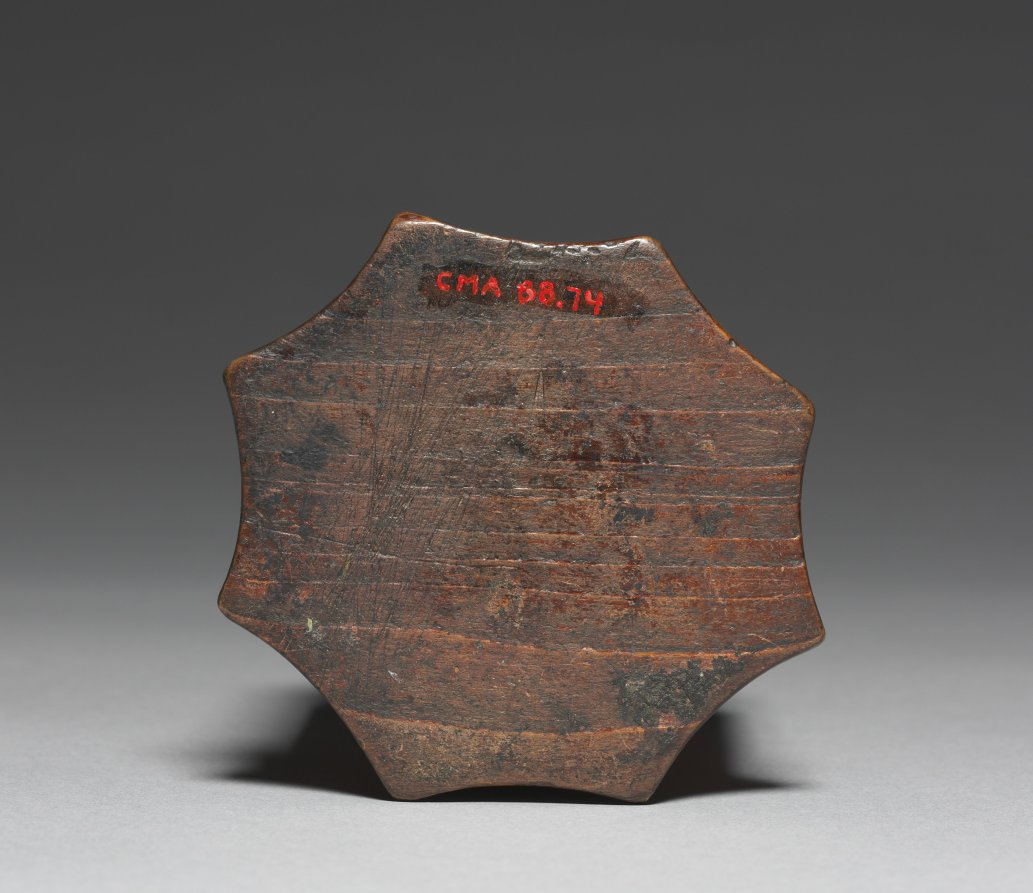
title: Brush Holder with Bamboo and Landscape Design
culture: Korea, Joseon dynasty (1392–1910)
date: 1800s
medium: carved bamboo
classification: Wood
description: An 18th-century Korean collector Yu Man-joo (1755–1788) wrote that “spending money on luxury clothing, dishes, and decorations for the home is a waste, but acquiring fancy writing tools helps to develop elegant taste and high-mindedness.” Inspired by aesthetic discourses on elegance versus vulgarity in late Ming Chinese literature, Korean collectors in the late 1700s and 1800s strove to assemble objects that would display their intellect and sophisticated taste. Stationery objects in particular—printed books, finely crafted brushes, brush holders, ink stones, water droppers, stone wares with grayish-white crackled glazes as well as bronze vessels, and incense burners—were all objects that reflected pure and elegant taste.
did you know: Stationery objects such as this brush holder were highly appreciated among scholars, not only for their function, but for their aesthetic.